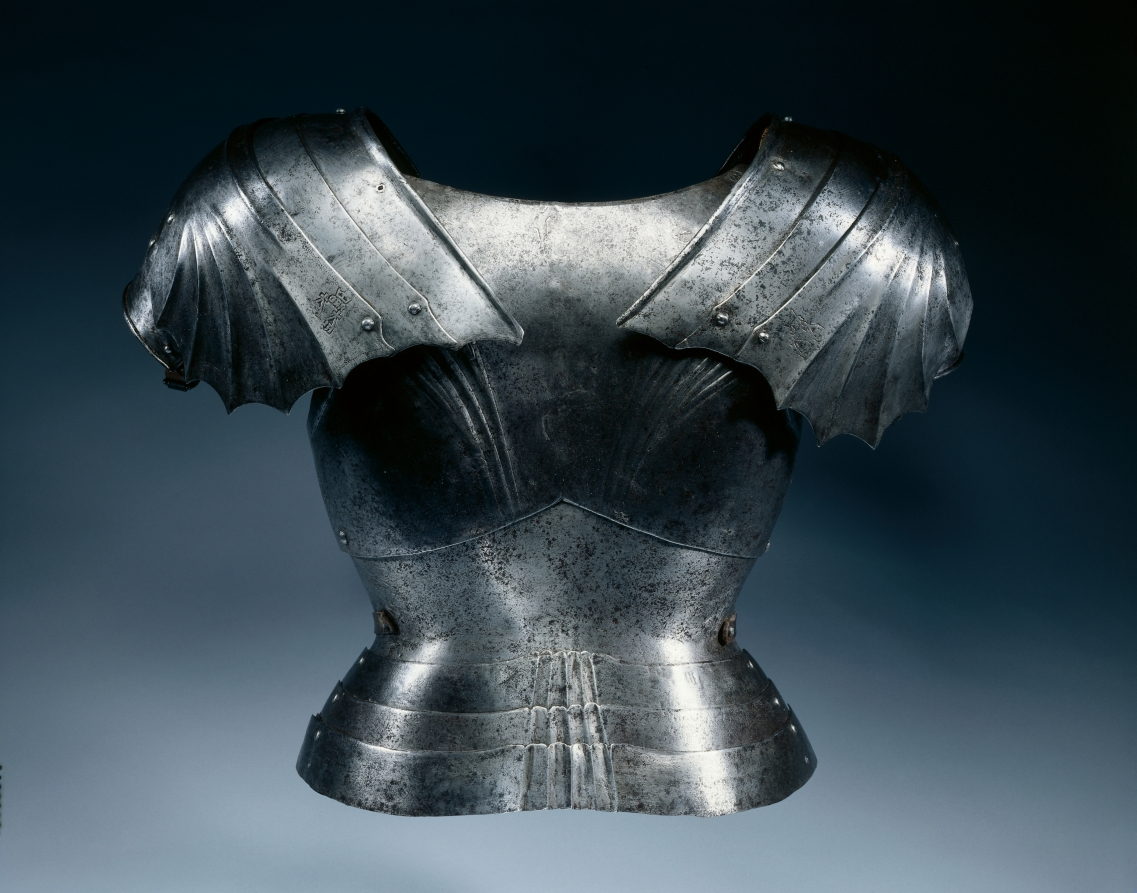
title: Gothic Backplate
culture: Germany, late 15th Century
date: c. 1475–1500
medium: steel, modern leather straps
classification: Arms and Armor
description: Over time the increasing effectiveness of the crossbow and longbow made steel plates necessary for protection. Around 1400 a knight was protected almost entirely by plate armor. The elements shown here (backplate and fan-shaped pauldrons), with their sculptural line, illustrate the beauty of plate armor from the Gothic age.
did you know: This armor would have been polished mirror bright and been a spectacular sight in the sunlight.